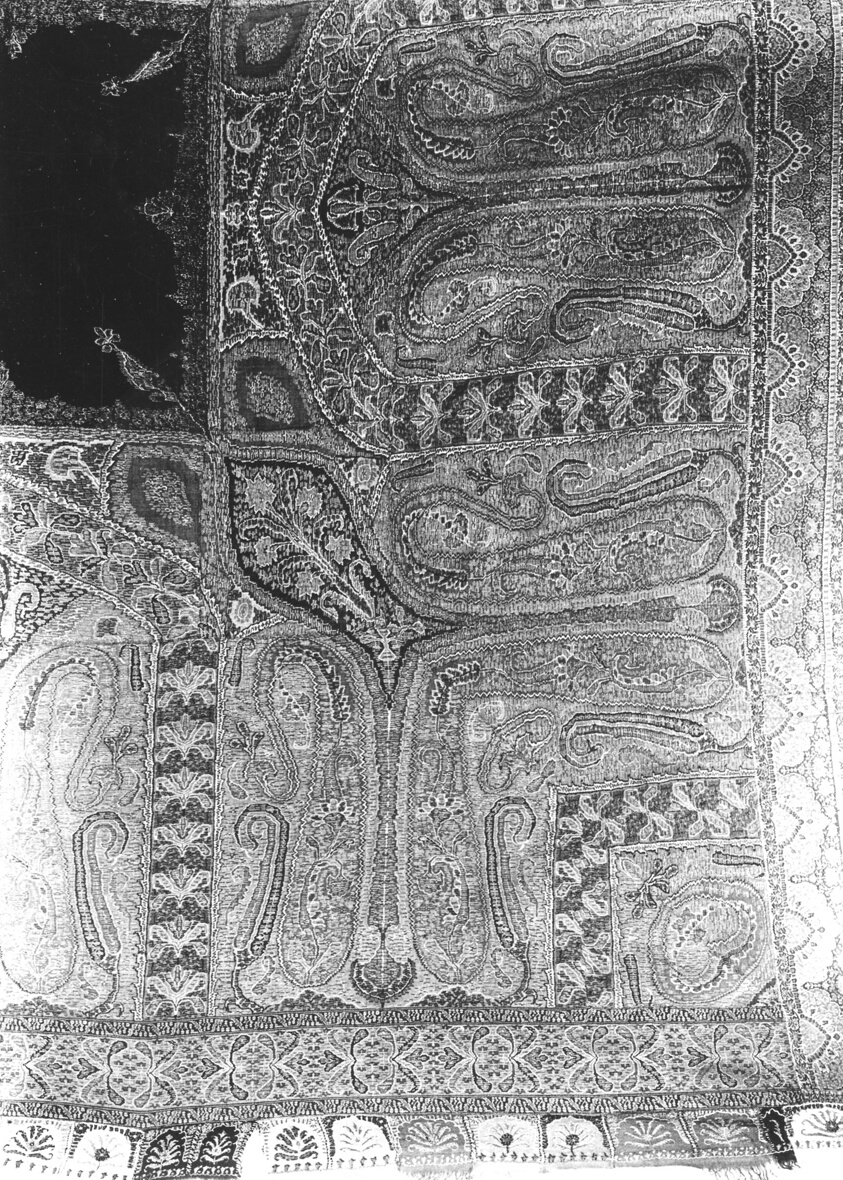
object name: Costume and Accessories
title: Shawl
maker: India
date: c. 1840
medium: Interlocking twill weave; embroidered; pieced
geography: India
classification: textile; costume; weaving; dress (garment); clothing